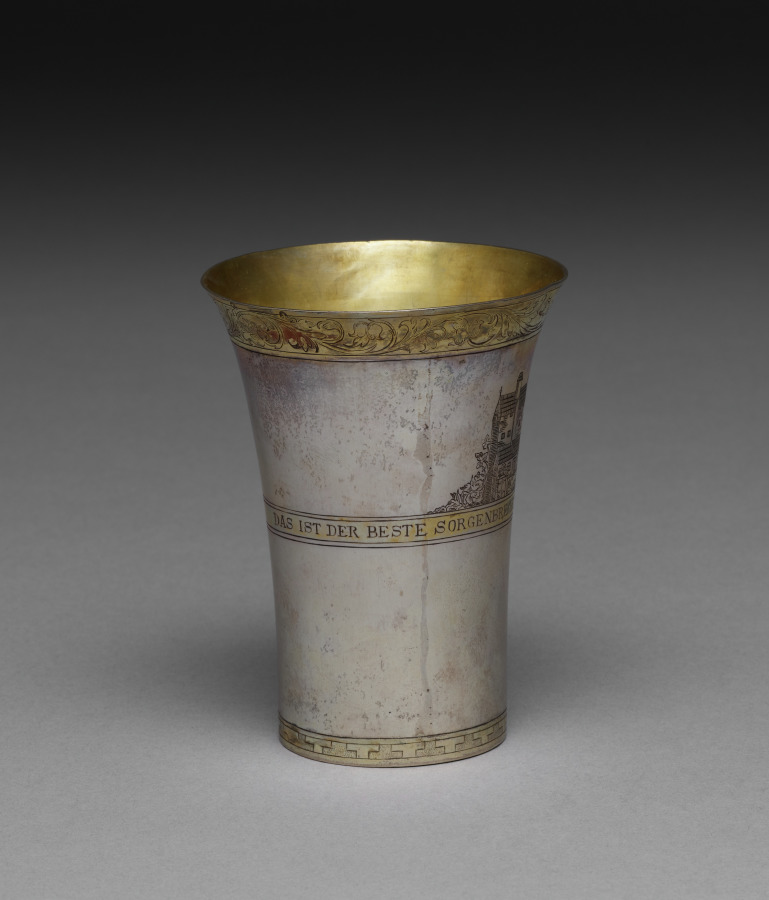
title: Beaker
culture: Germany, Munich, mid-18th century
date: mid 1700s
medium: silver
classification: Silver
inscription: Engraved around side: "EIN GVTER TRVNK AUS VOLLEM BECHER -- DAS IST DER BESTE SORGENBRECHER."